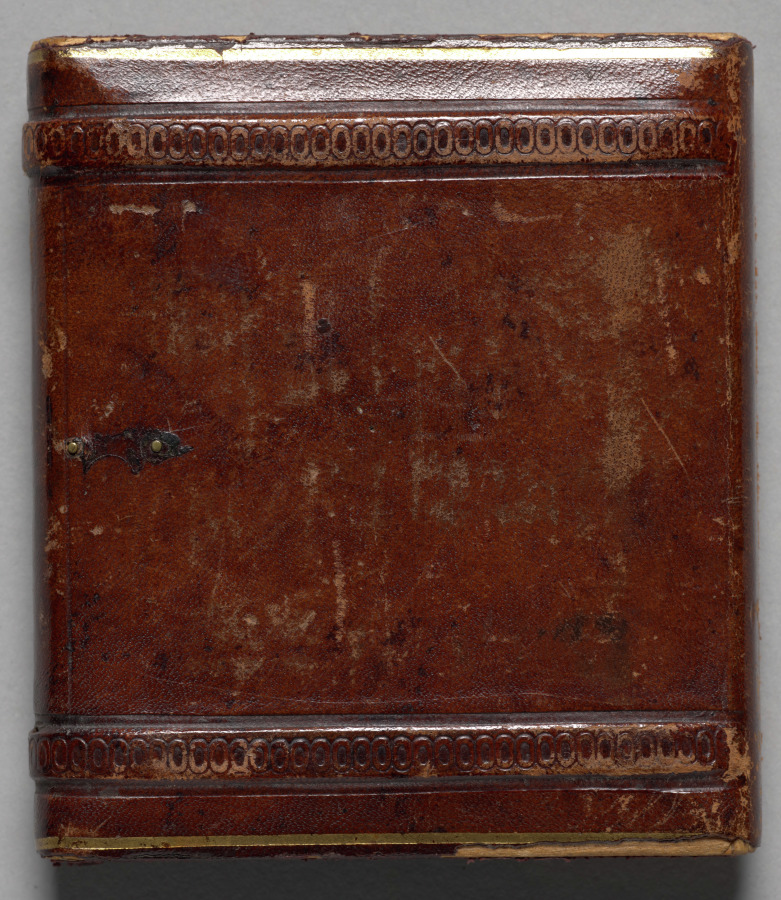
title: Miner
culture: America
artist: Robert H. Vance (American, 1825–1876)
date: c. 1853–55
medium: daguerreotype, sixth plate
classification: Photograph